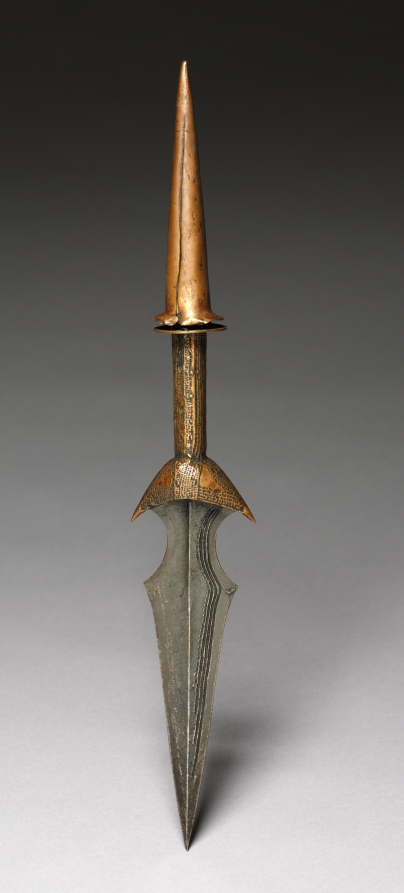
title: Knife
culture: Africa, Central Africa, Democratic Republic of Congo, unknown maker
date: 1800s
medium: Iron, wood, copper alloy, cloth, and resin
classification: Arms and Armor